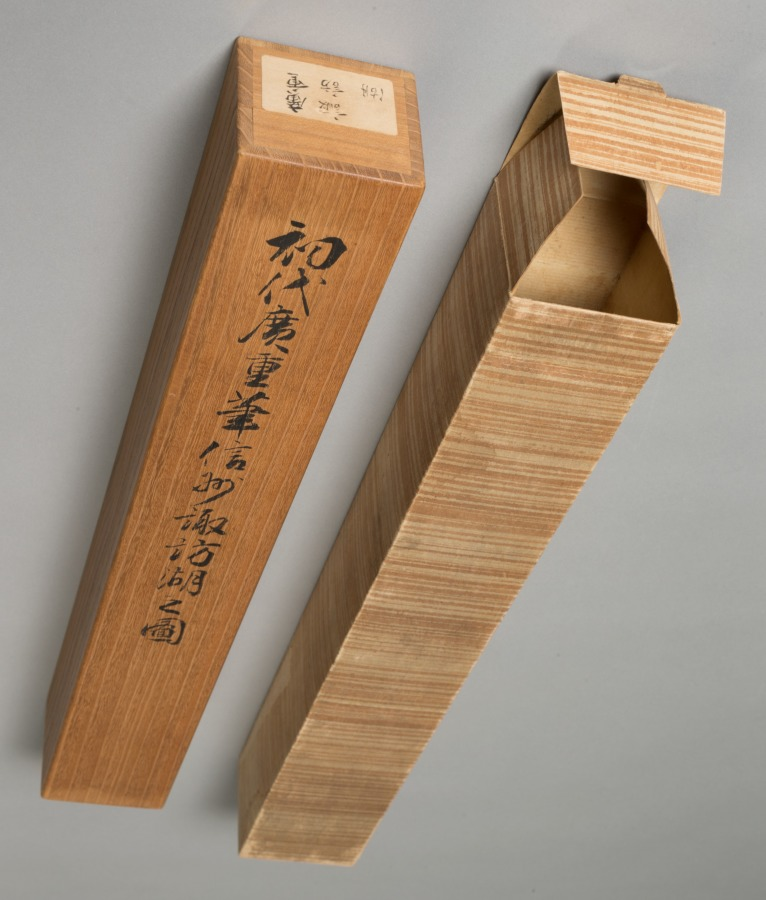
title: Lake Suwa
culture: Japan, Edo period (1615–1868)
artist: Utagawa Hiroshige (Japanese, 1797–1858)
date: c. 1832–58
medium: hanging scroll; ink and color on silk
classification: Painting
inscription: 立斎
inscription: 廣重